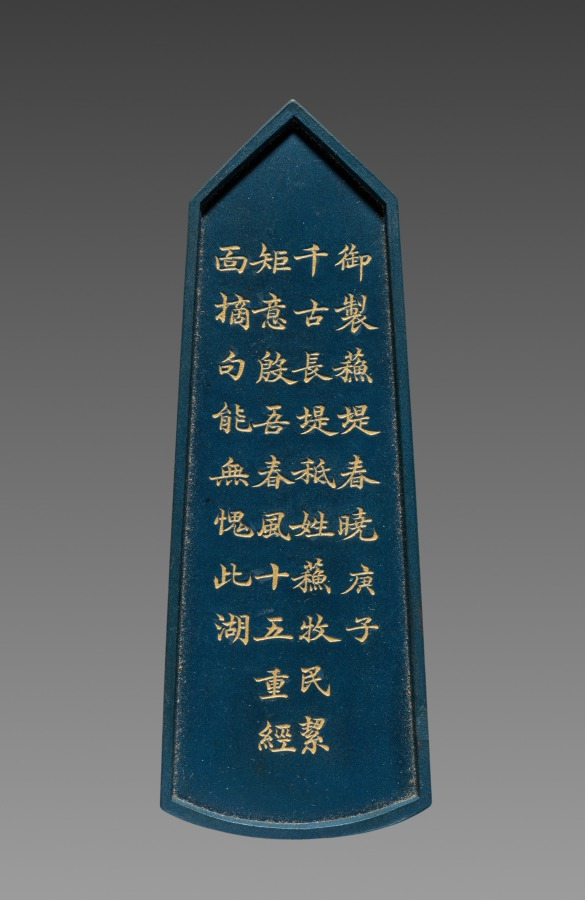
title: Ink Stick from an Imperially Commissioned Set of Ink Stick with Images and Poems of Famous West Lake Sites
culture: China, Qing dynasty (1644–1911), Qianlong reign (1736–95)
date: 1780–94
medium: Molded ink in blue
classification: Miscellaneous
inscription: 乾隆年製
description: This is one of ten ink cakes of different shapes and colors stored in an exquisite lacquer box. Each is inscribed in gold with a poem by the Qianlong emperor, praising the ten famous sights of the Westlake in Hangzhou, near Shanghai. The Westlake is famous for its natural beauty; it was a favorite imperial destination and remains a tourist attraction today. Ink cakes (also called ink sticks) are dissolved with the addition of water and ground on the surface of a flat stone into liquid ink for painting and calligraphy. The precious ink cakes here, however, have never been used.